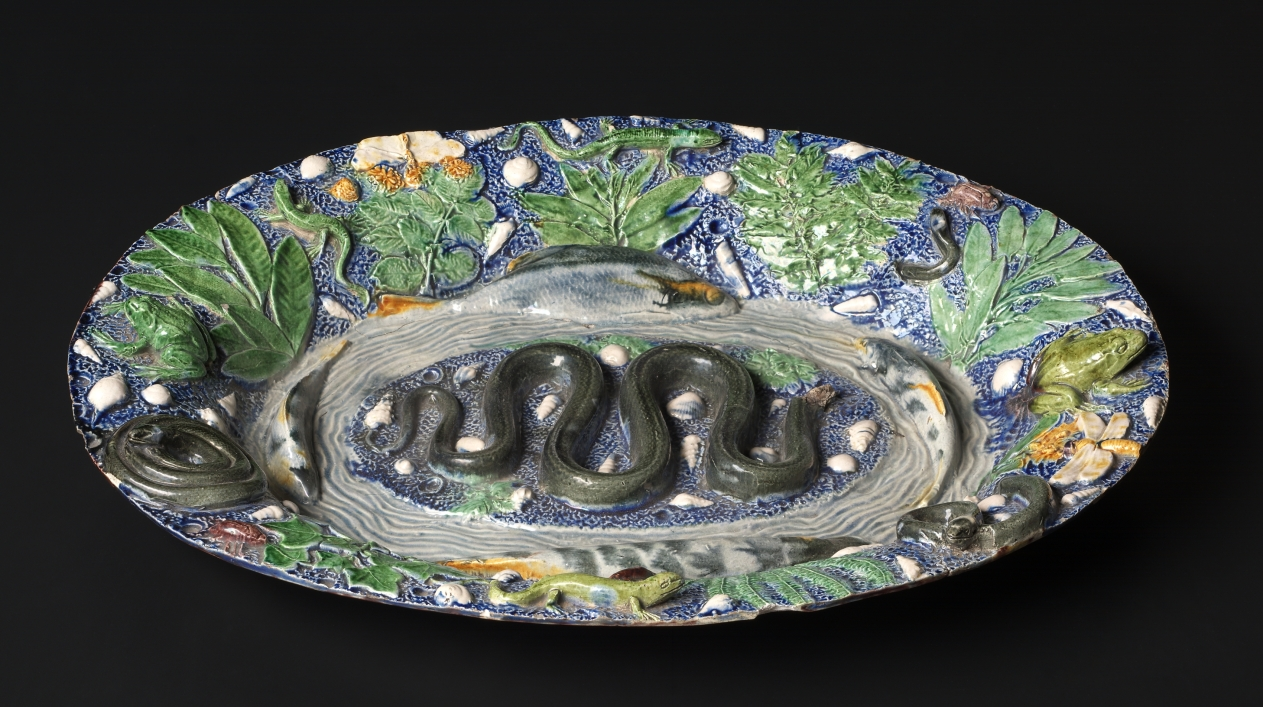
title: Rustic Platter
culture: France, 16th century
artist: manner of Bernard Palissy (French, 1510–1589)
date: late 1500s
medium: lead glazed earthenware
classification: Ceramic